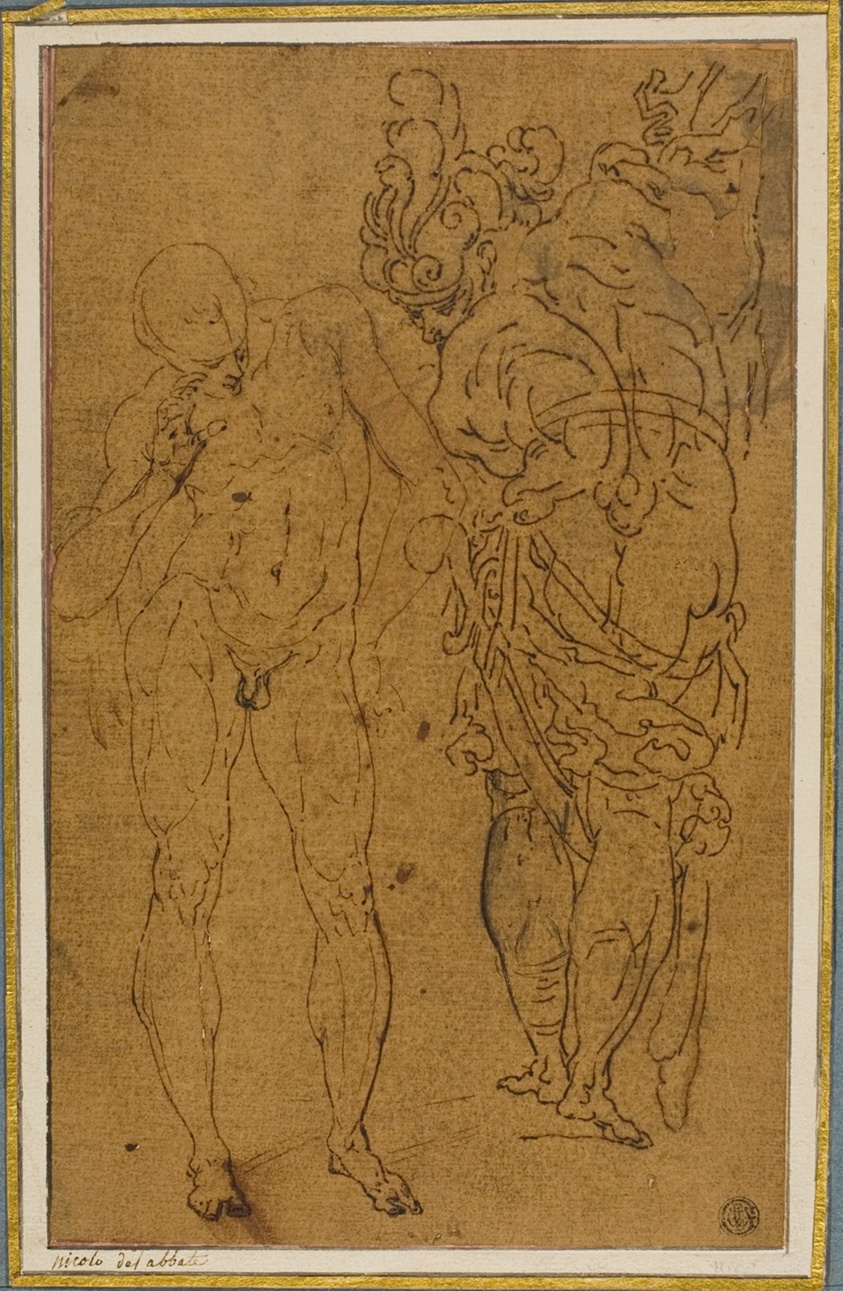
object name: Drawing and Watercolor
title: Male Nude and Warrior in Armor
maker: Style of Giulio Benso (Italian, 1601-1668); or Andrea Semino (Italian, 1525-1595); or Niccolò dell' Abbate (Italian, c. 1512-1571); or Martin Fréminet (French, 1567-1619)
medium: Pen and brown ink, with black chalk, on brown tinted laid paper, laid down on ivory laid paper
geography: Italy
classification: pen and ink drawings; paper; drawings (visual works); prints and drawing